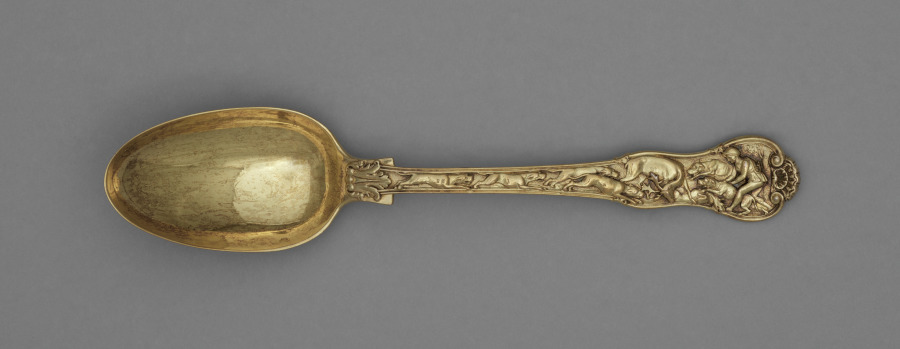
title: Dessert Spoon with Hunt Scenes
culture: England, London, 19th century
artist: Paul Storr (British, 1771–1844)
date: c. 1822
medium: gilt silver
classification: Silver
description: Paul Storr was perhaps the most famous and successful English silversmith working in the early 19th century. This fork and spoon were originally part of a larger set. The exceptionally high quality of the metalworking and gilding of these pieces is typical of Storr's work.